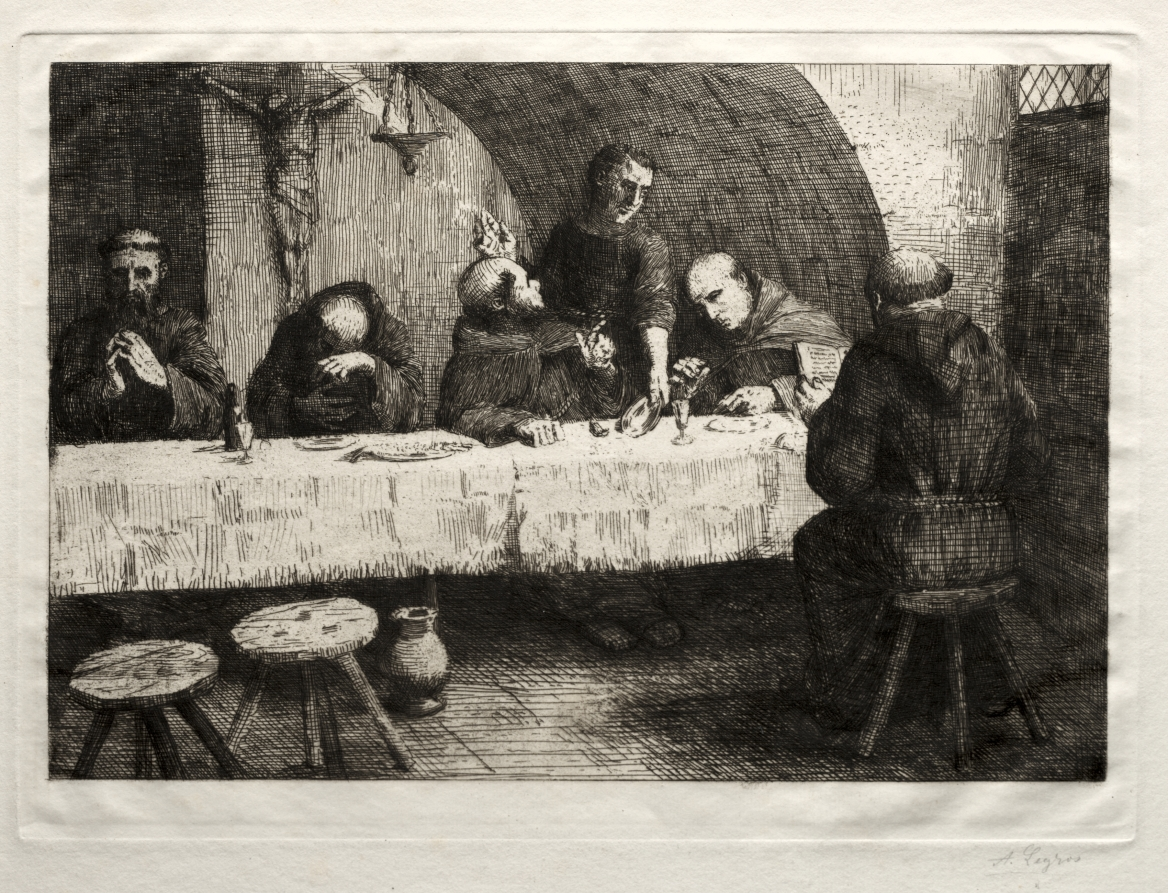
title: The Refectory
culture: France, 19th century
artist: Alphonse Legros (French, 1837–1911)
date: c. 1862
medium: etching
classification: Print